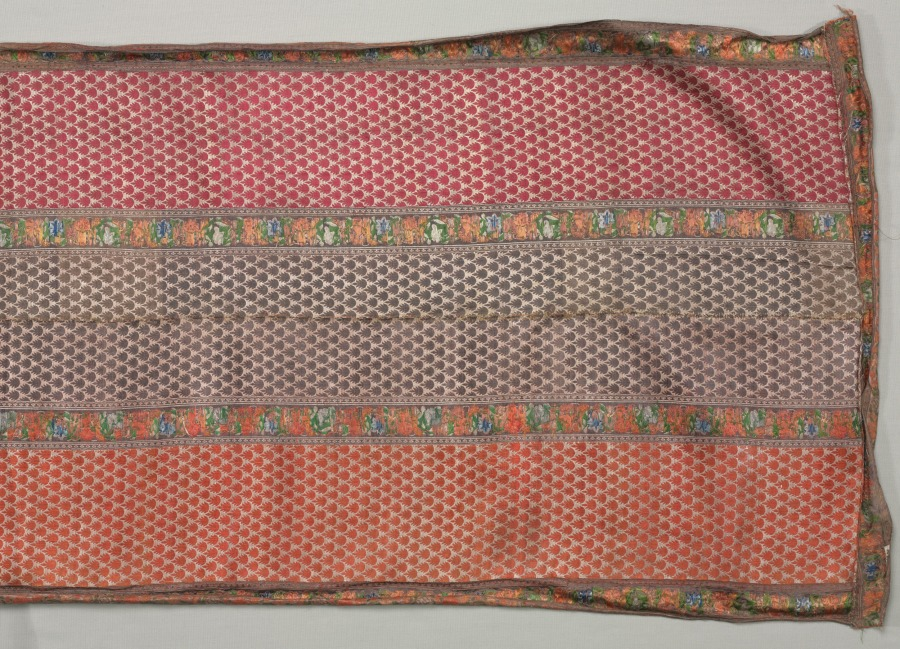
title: Sash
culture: Iran, 18th century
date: 1700s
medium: Silk taquete, brocaded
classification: Textile